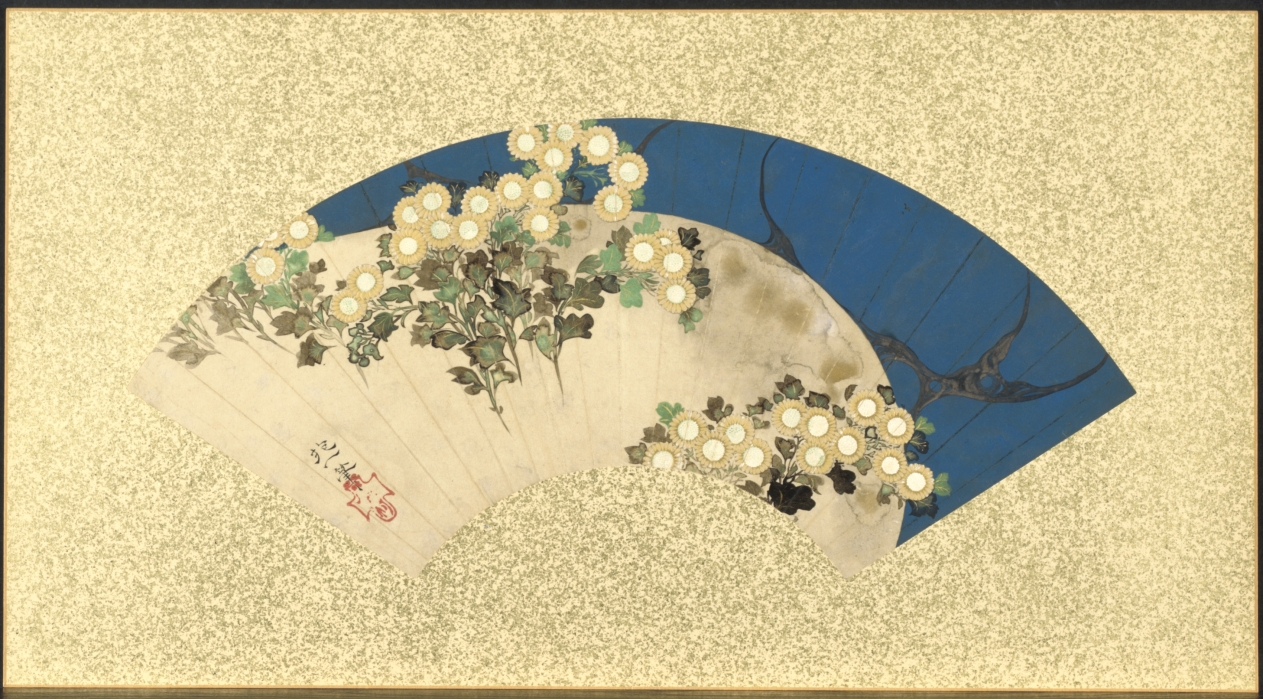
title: Chrysanthemums by the Water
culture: Japan, Edo period (1615–1868)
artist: Sakai Hōitsu (Japanese, 1761–1828)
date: 1761–1828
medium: fan painting: ink, color, and gold on paper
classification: Painting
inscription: signature at left: " Hoitsu painted," and seal: "oson."